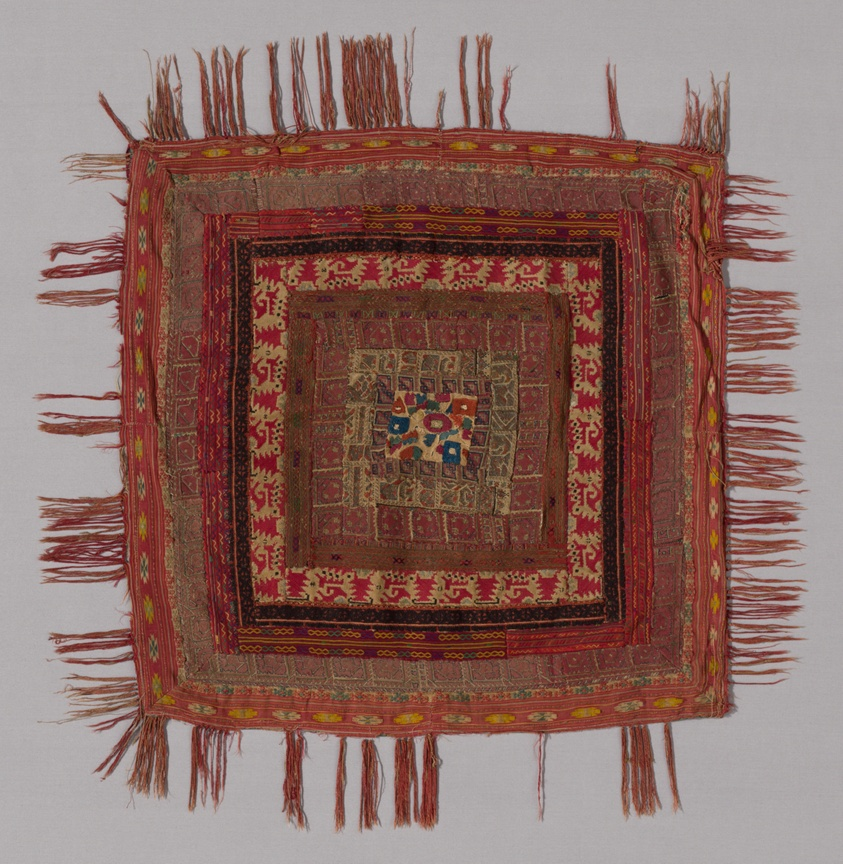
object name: Textile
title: Pillow Cover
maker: Possibly Rhodes (Dodecanese Islands) or mainland Greece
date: 1850/99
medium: Wool, cotton, and linen, various plain weaves, some balanced, some weft-faced, some fulled, some with discontinuous wefts; pieced; embroidered in chain, buttonhole, tent, long and short, cross, and back and double running stitches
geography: Greece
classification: textile; needlework (visual works)